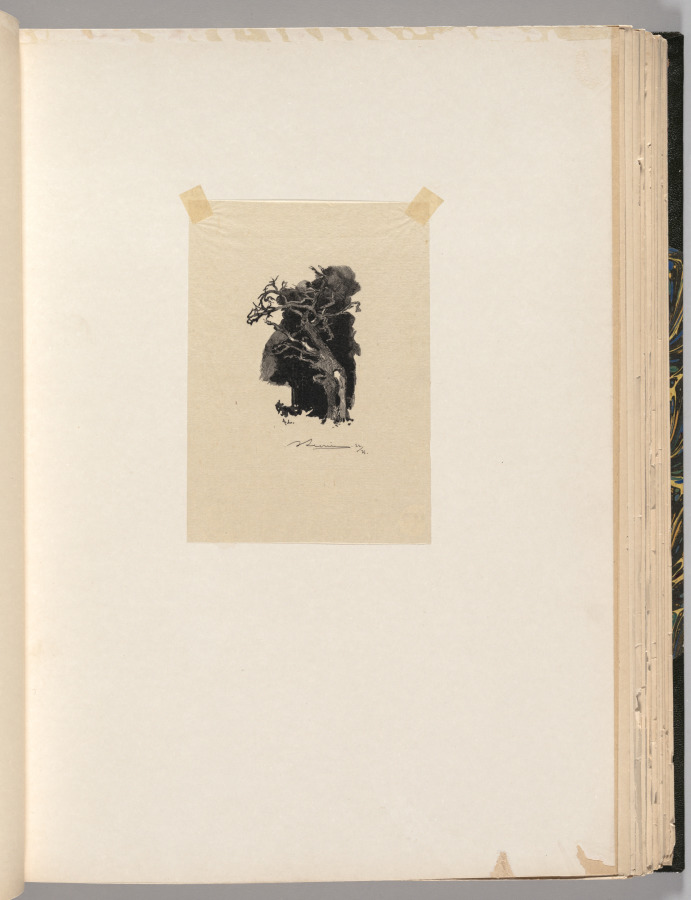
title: Fontainebleau Forest: The Raging One (La Forêt de Fontainebleau: Le rageur)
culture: France, 19th century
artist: Auguste Louis Lepère (French, 1849–1918)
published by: A. Desmoulins, Published in Revue Illustrée, 1887–90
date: 1890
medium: wood engraving from bound volume of 34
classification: Bound Volume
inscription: On window mat, lower right, in graphite: Le rageur